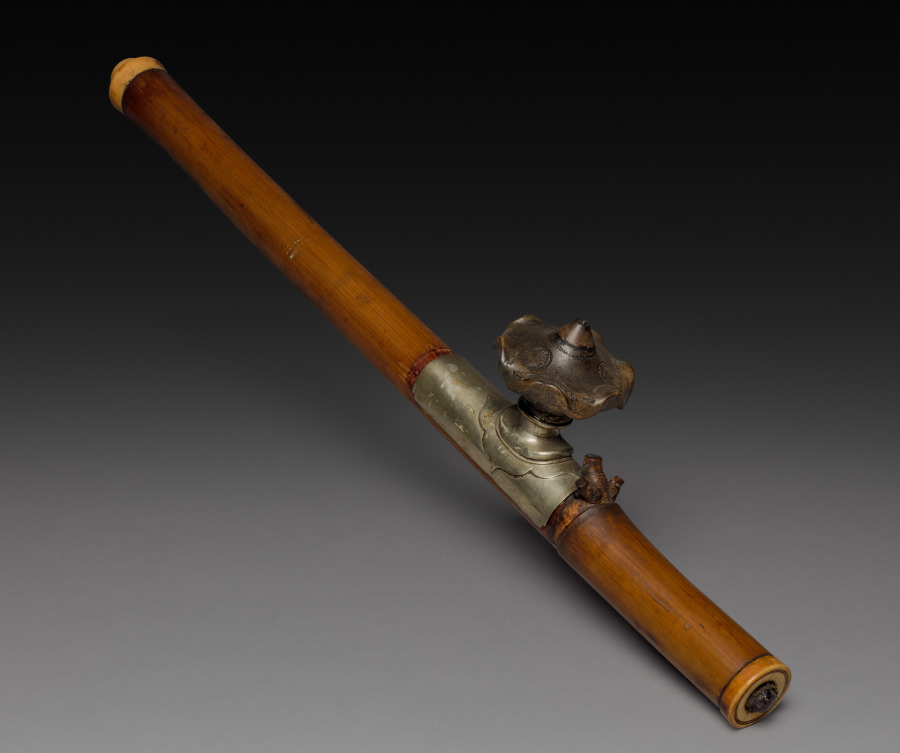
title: Opium Pipe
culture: China, Qing dynasty (1644-1911)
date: 1800s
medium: wood and ivory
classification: Miscellaneous